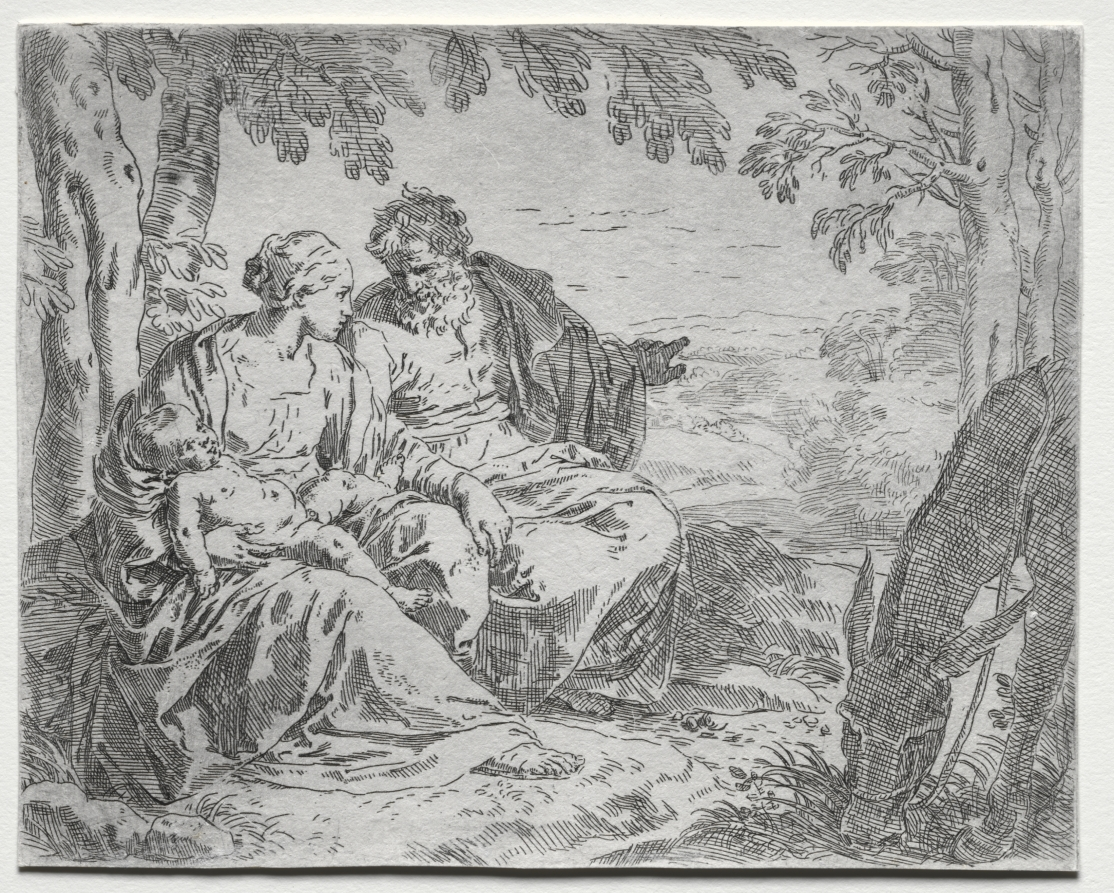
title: Rest on the Flight in to Egypt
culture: Italy, 17th century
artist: Simone Cantarini (Italian, 1612–1648)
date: 1632–48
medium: etching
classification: Print